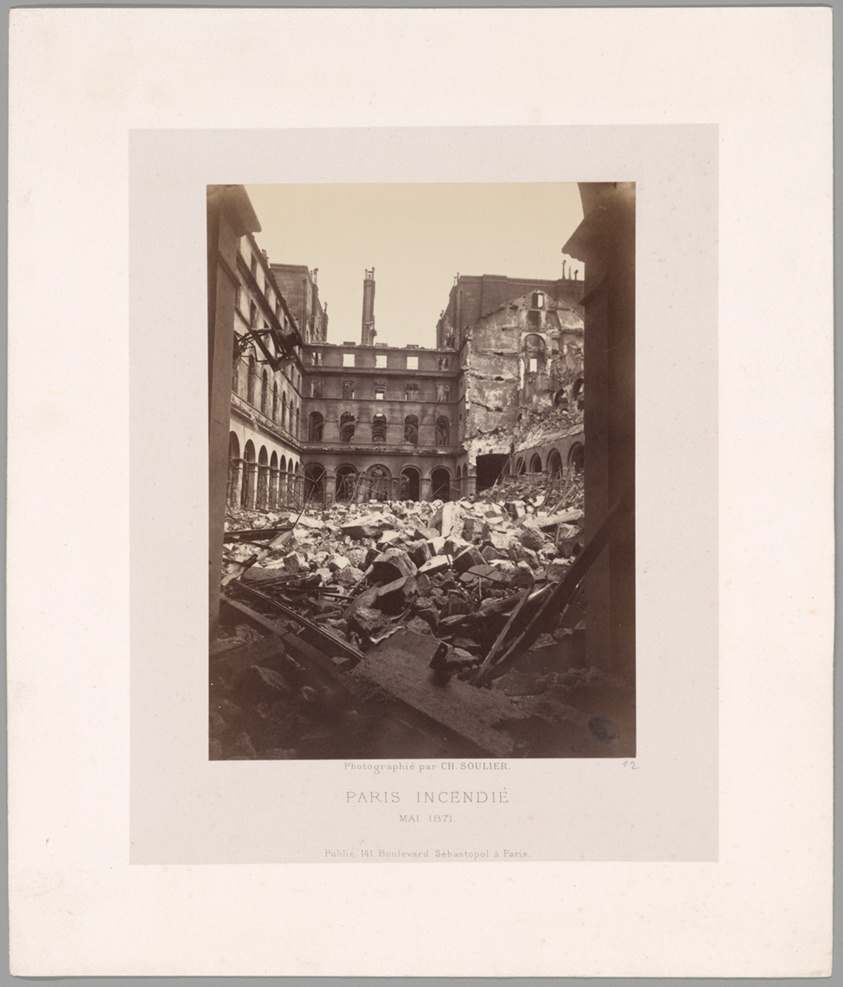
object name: Photograph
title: Paris Fire (Interior of the Ministry of Finance), from the series "Paris Incendié"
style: 19th century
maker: Charles Soulier (French, 1840–1875)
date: May 1871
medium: Albumen print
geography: France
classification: gelatin silver (developing-out-paper) pr; photographic process; photography; photograph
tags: Collected by Hugh Edwards, Paris